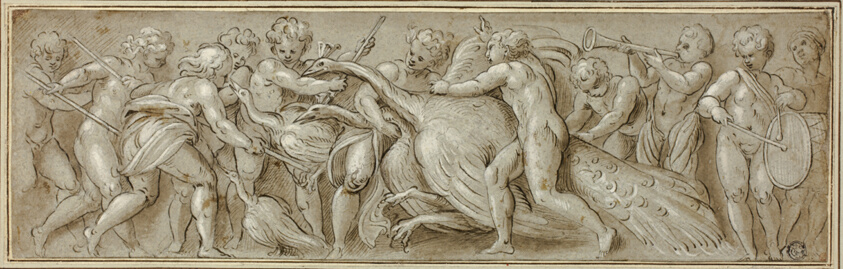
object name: Drawing and Watercolor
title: Putti with Peacocks and Musical Instruments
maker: Workshop of Lattanzio Gambara (Italian, c. 1530-1574)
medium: Pen and brown ink with brush and brown wash, heightened with lead white, on blue-gray laid paper, laid down on ivory laid paper, laid down on gray card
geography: Italy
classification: ink with wash; drawings (visual works); prints and drawing